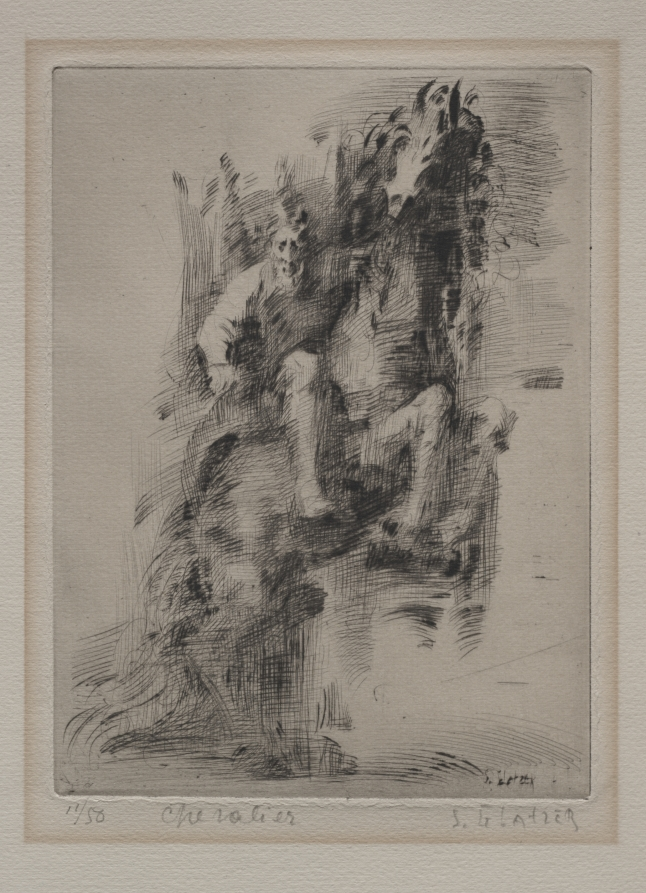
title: Chevalier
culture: France, 20th century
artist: Simon Glatzer (French, 1890–1945)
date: c. 1914–45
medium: drypoint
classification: Print